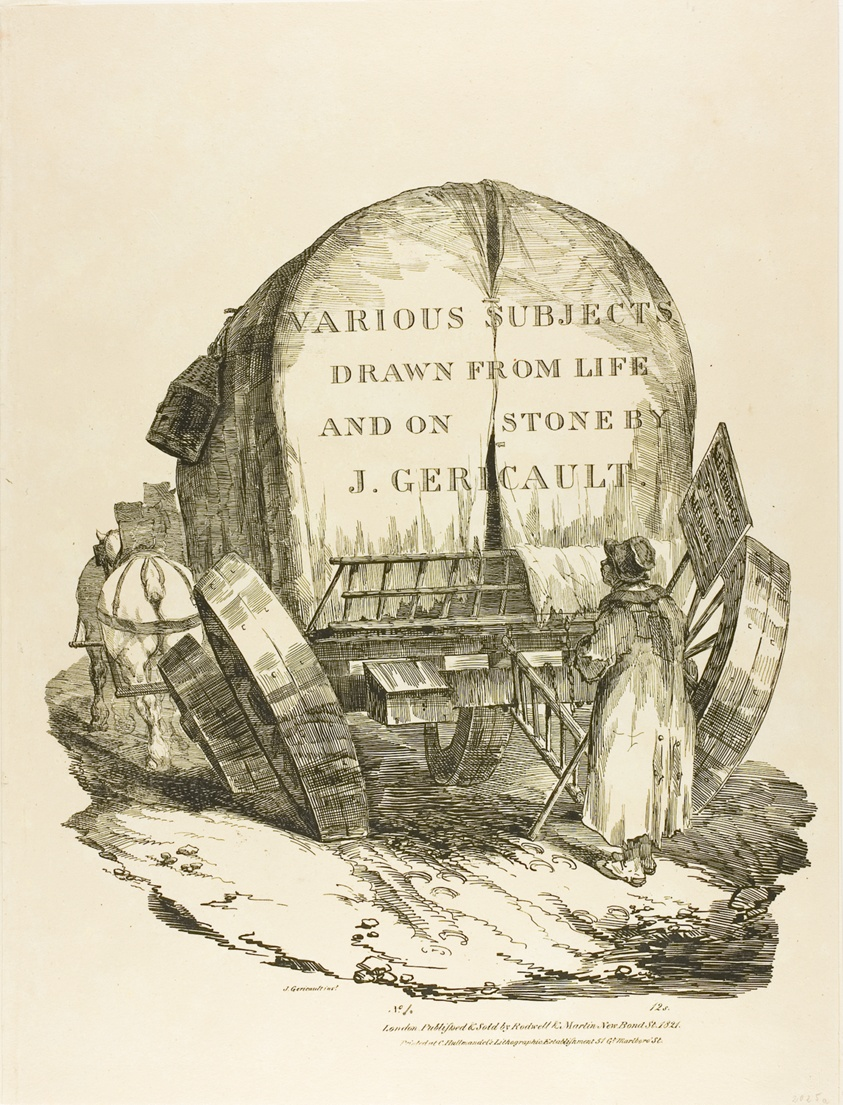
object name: Print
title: A Horse-Drawn Wagon, Title Page for Various Subjects Drawn from Life and on Stone (The English Suite)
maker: Jean Louis André Théodore Géricault (French, 1791-1824); printed by Charles Joseph Hullmandel (German and English, 1789-1850); published by Rodwell and Martin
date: 1821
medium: Bi-fold portfolio cover with pen-lithographed title page in black on buff wove paper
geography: France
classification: lithograph; print; prints and drawing